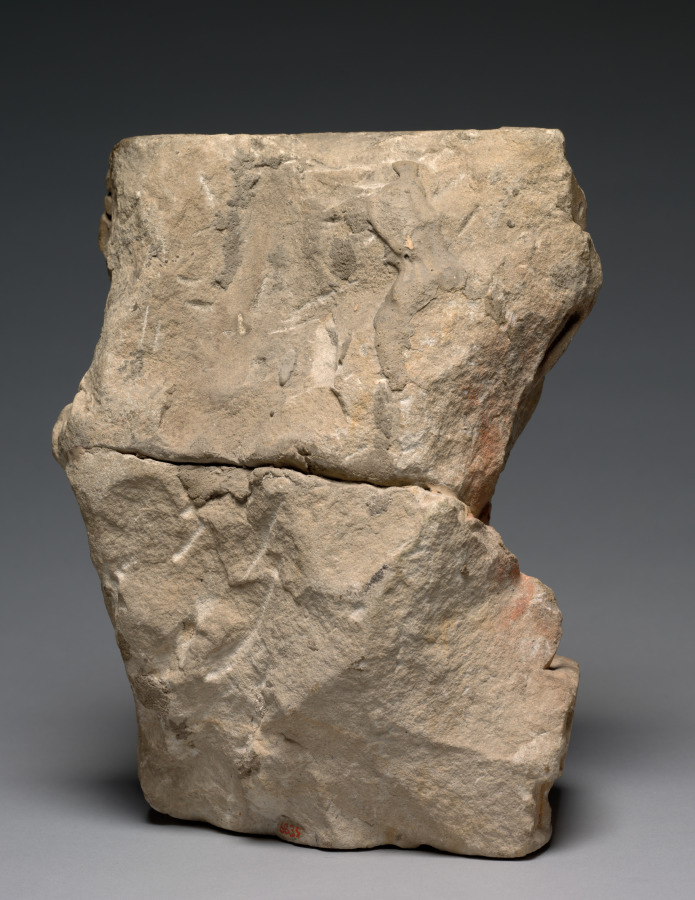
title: Fragment of a Double Capital: Mary and Martha at the Raising of Lazarus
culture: Southwest France, Ariège, region of Foix, mid-12th century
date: 1145–1165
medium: quartz sandstone with traces of polychromy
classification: Sculpture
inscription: inscription above the draped figures of Mary and Martha: "MARIA ET MARTA"; to the left of the two figures is a portion of a decorated sarcophagus depicted in the lower half with an inscription of Christ's words: "VENI FORAS" ([Lazarus] come forth).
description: The front face of this capital fragment presents the two mourning women identified by the inscription above: MARIA ET MARTA. On the left face appears the body of Lazarus in a sarcophagus bearing Christ's words: VENI FORAS ("[Lazarus], come forth" [John 11:43]). The Raising of Lazarus is one of the most popular themes in Christian art. This miracle represents Christ's power over death and thus prefigures the Resurrection. It also speaks of the hope of resurrection for all individuals, a common theme in early Christian catacombs and sarcophagi. The subject is less prevalent in sculpture of the Romanesque period, though quite popular in other media.